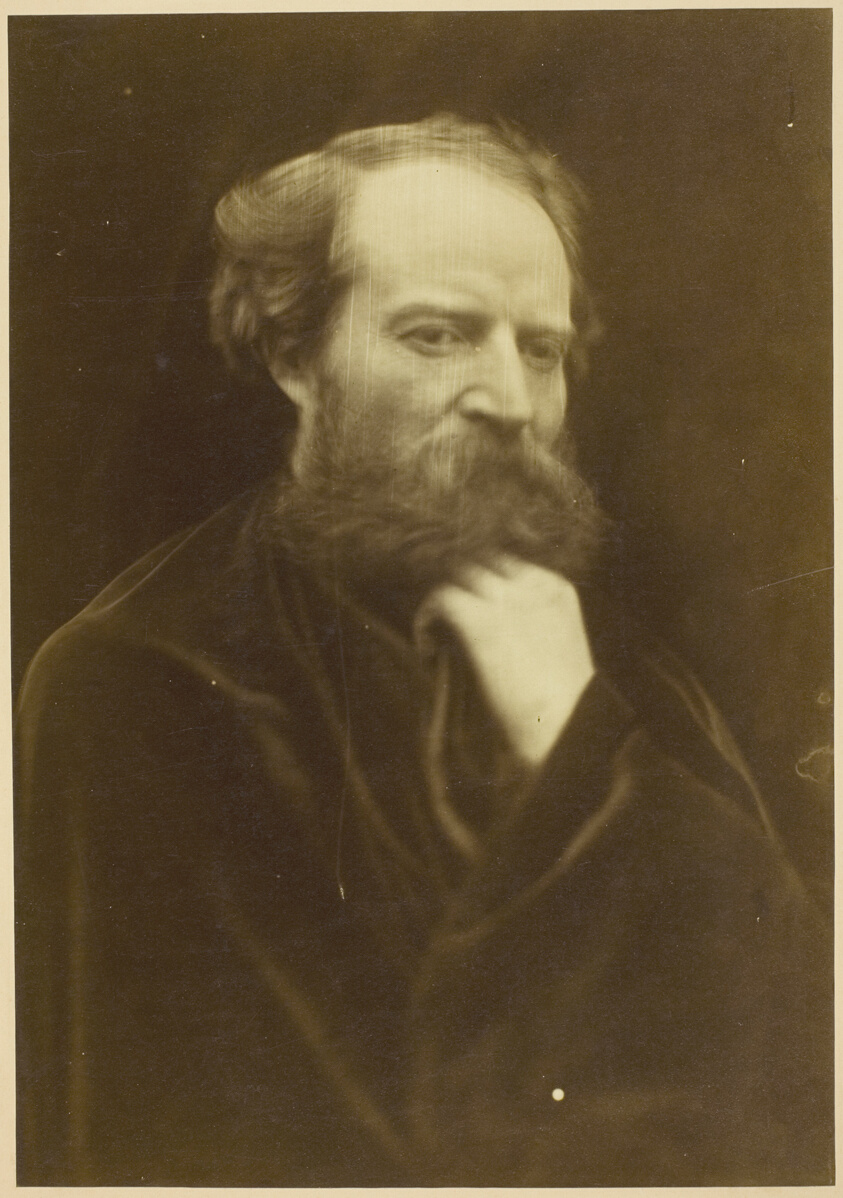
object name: Photograph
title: Unknown sitter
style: 19th century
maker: Julia Margaret Cameron (English, 1815–1879)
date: 1868/74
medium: Albumen print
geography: England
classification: albumen silver print; photographic process; photography; photograph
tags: portraits, portraits: male subject, photography